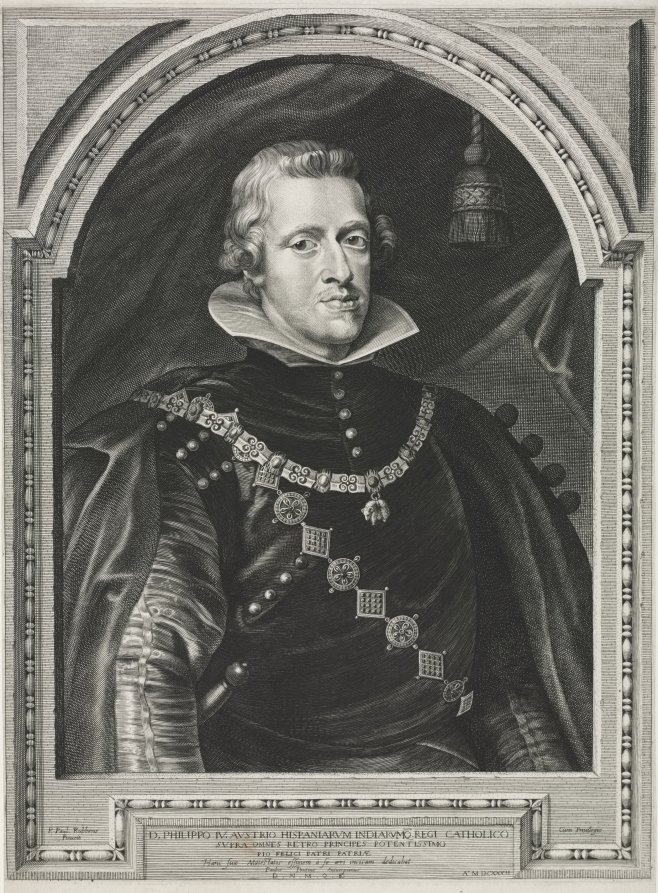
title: Portrait of Philip IV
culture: Flanders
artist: Paulus Pontius (Flemish, 1603–1658)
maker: after Peter Paul Rubens (Flemish, 1577–1640)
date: 1600s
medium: engraving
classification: Print